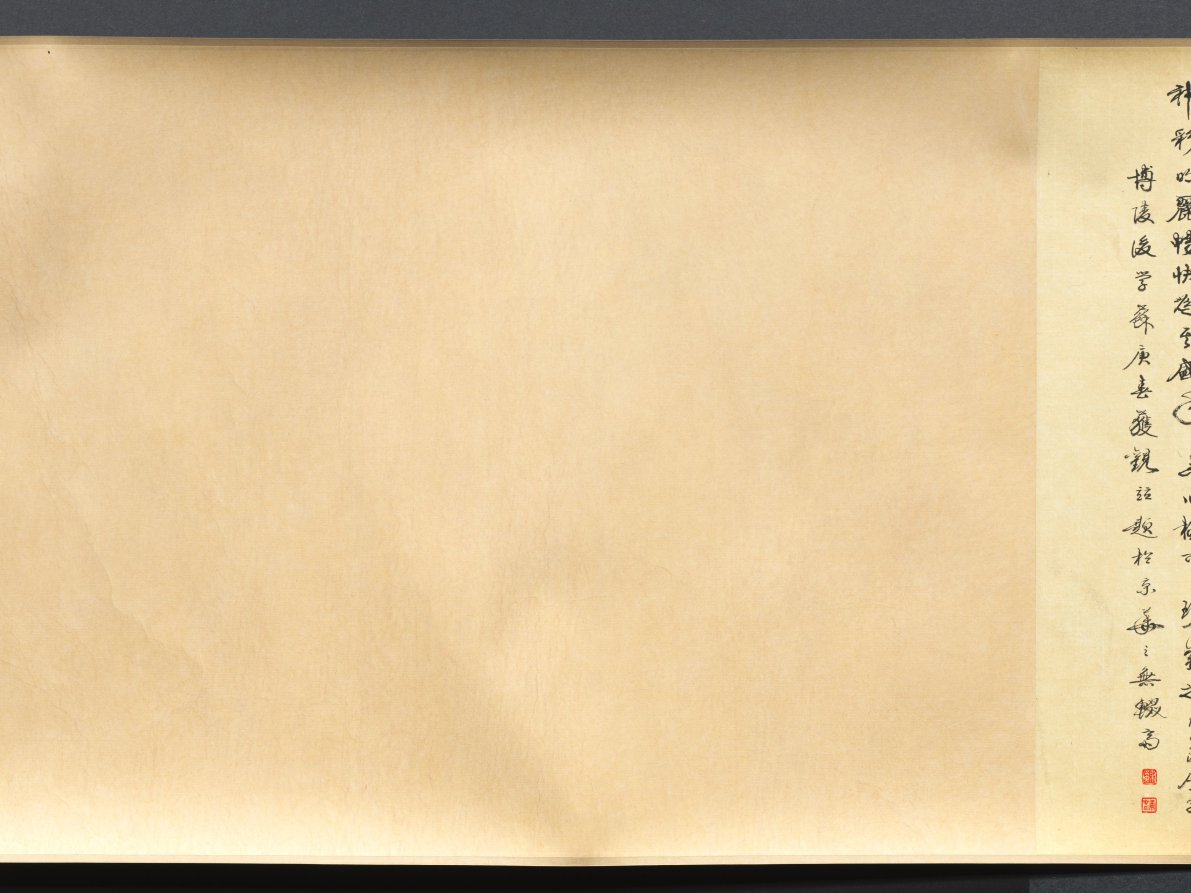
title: Calligraphy in Running Style based on Wang Bo's Essay on Tengwang Pavilion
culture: China, Changbai, Qing dynasty (1644-1911)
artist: Tiebao (Chinese, 1752–1824)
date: 1811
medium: handscroll, ink on paper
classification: Calligraphy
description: A member of the Donggo clan, Tiebao belonged to the Manchu Plain Yellow Banner army. As an official in the Qing court, he endured considerable vicissitude and his career was never smooth. Celebrated as a man of letters, he oversaw the publications of the Manchu military system as well as an anthology of poems by members of the imperial family and other Manchu dignitaries. In calligraphy, he was regarded as the equal of such eighteenth-century luminaries as Liu Yong (1720-1805) and Weng Fanggang (1733-1818). This handscroll is a work of his mature years and is exemplary of his disciplined and highly subtle approach to the art of calligraphy.